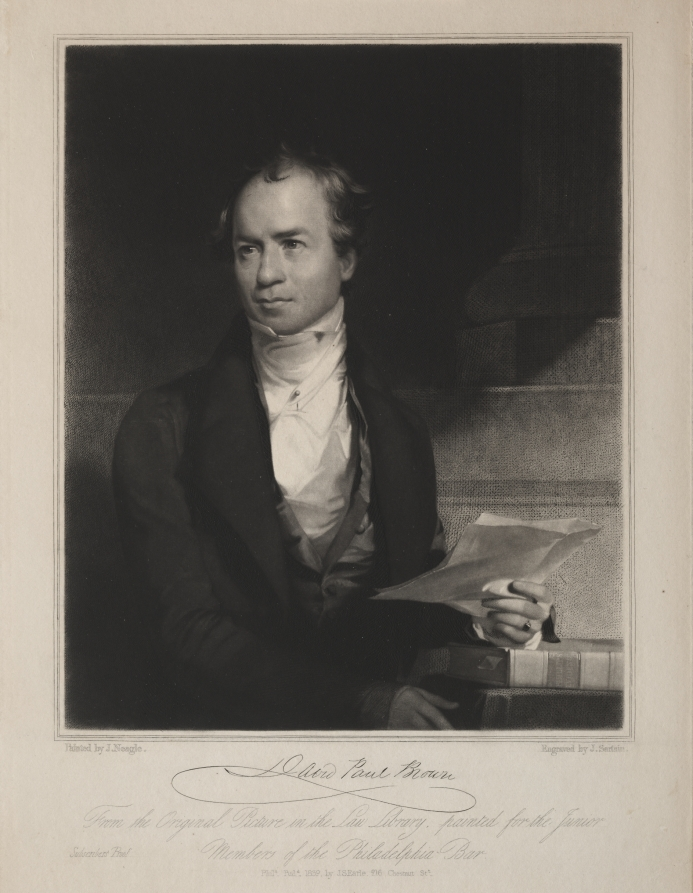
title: David Paul Brown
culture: America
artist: John Sartain (American, 1808–1897)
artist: after John Neagle (American, 1796–1865)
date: 1839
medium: mezzotint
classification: Print